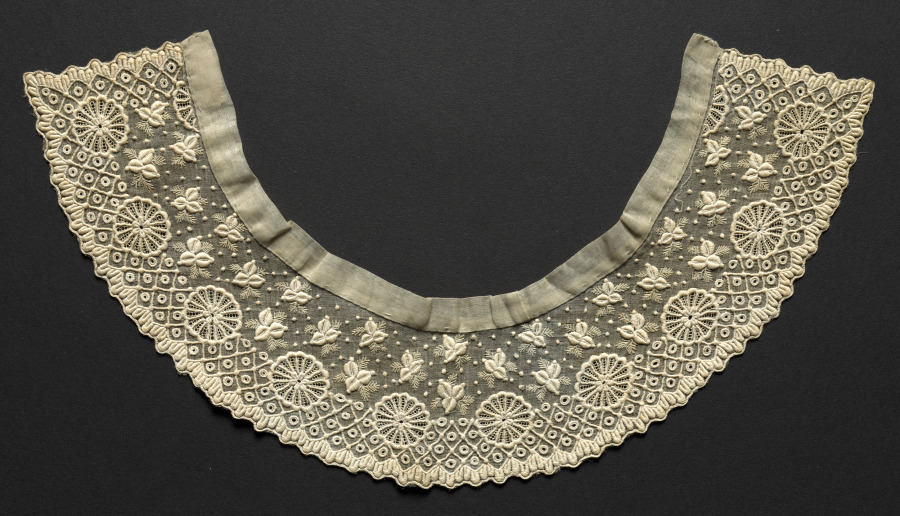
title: Lace and Embroidered Collar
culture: Madeira(?)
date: 1875–99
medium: Plain weave cotton: needle lace (cutwork) and linen embroidery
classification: Embroidery